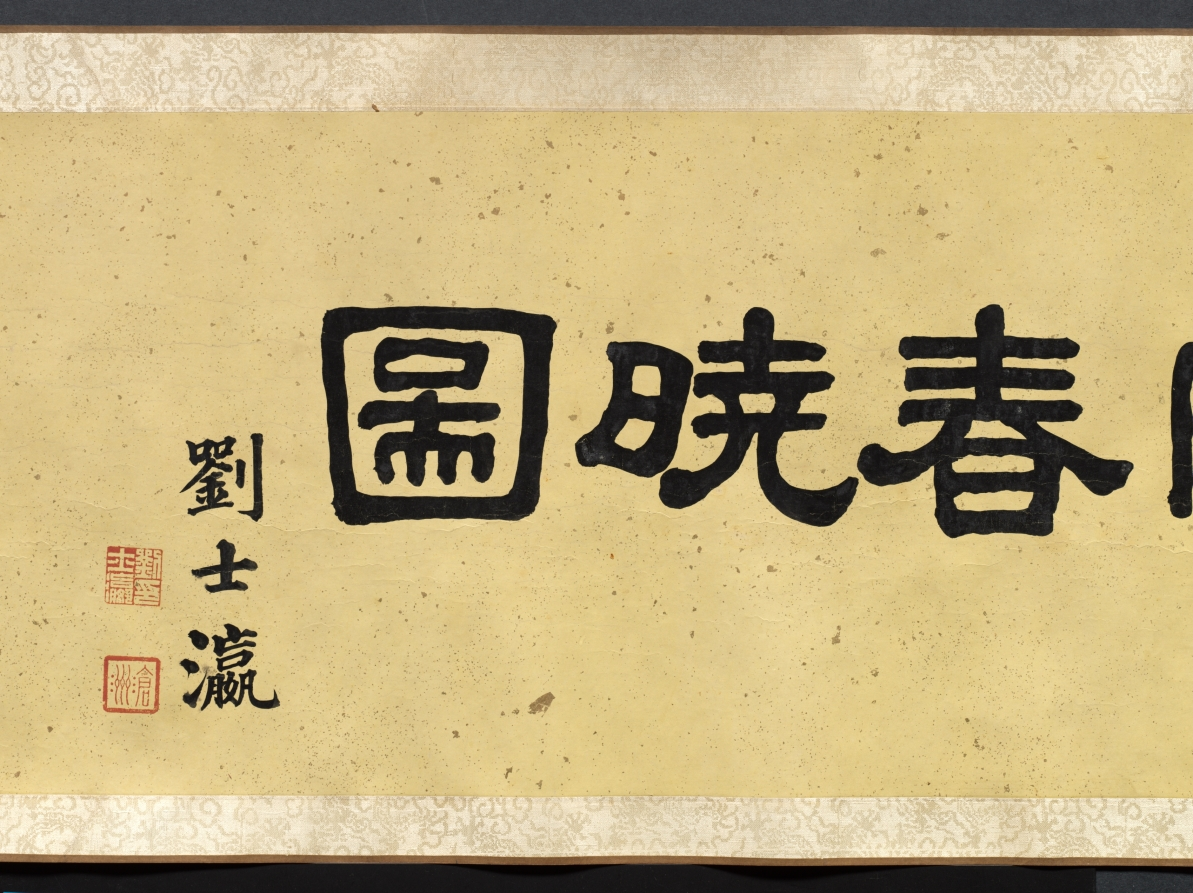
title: Palace Ladies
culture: China, Qing dynasty (1644-1911)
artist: copy after Qiu Ying (Chinese, 1494–1552)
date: 1644–1911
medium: handscroll, ink and color on silk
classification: Painting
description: This handscroll illustrates the pursuits of court ladies in a palace precinct on a spring day. Women, young girls, and their maids amuse themselves by sitting on a swing, playing games, watering and admiring peonies, performing music together, playing the qin (zither), feeding a parrot on the balustrade and fish in the water, or catching butterflies. The life of elite women was mostly restricted to the so-called inner quarters, meaning the garden and inner courts of the house. This painting idealizes the world of young palace girls that in fact was often filled with boredom and waiting for a lover.